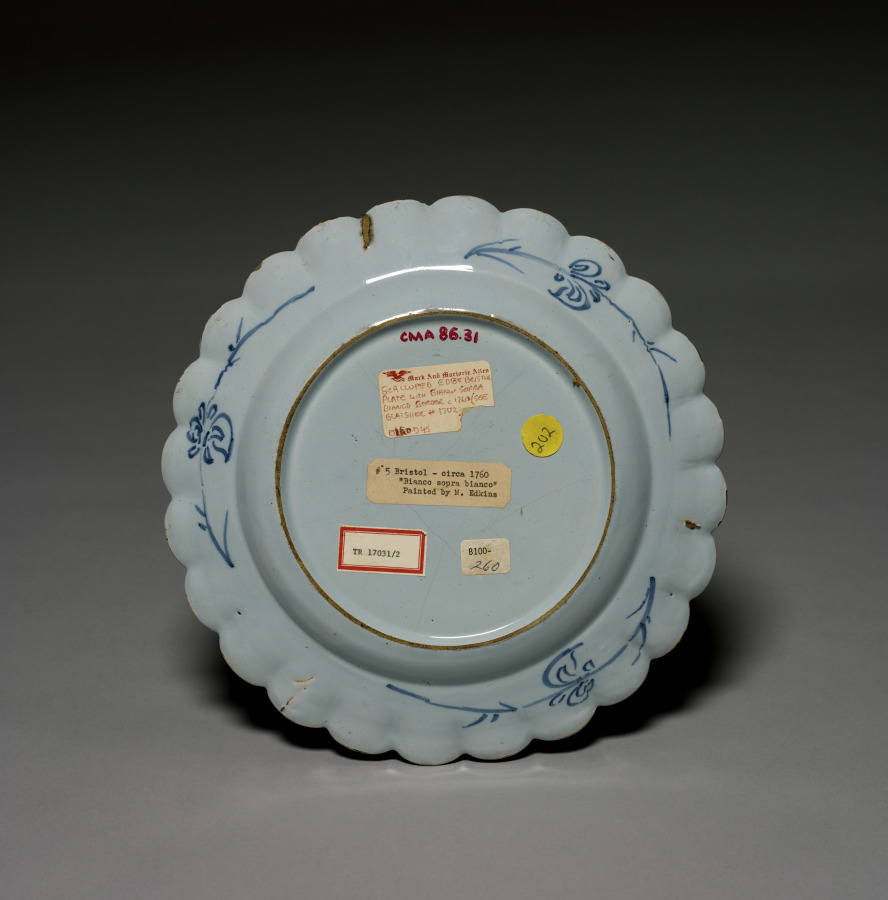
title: Plate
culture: England, 18th century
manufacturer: Bristol Porcelain Factory (British, 1770–82)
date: mid-1700s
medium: earthenware (delft ware)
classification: Ceramic